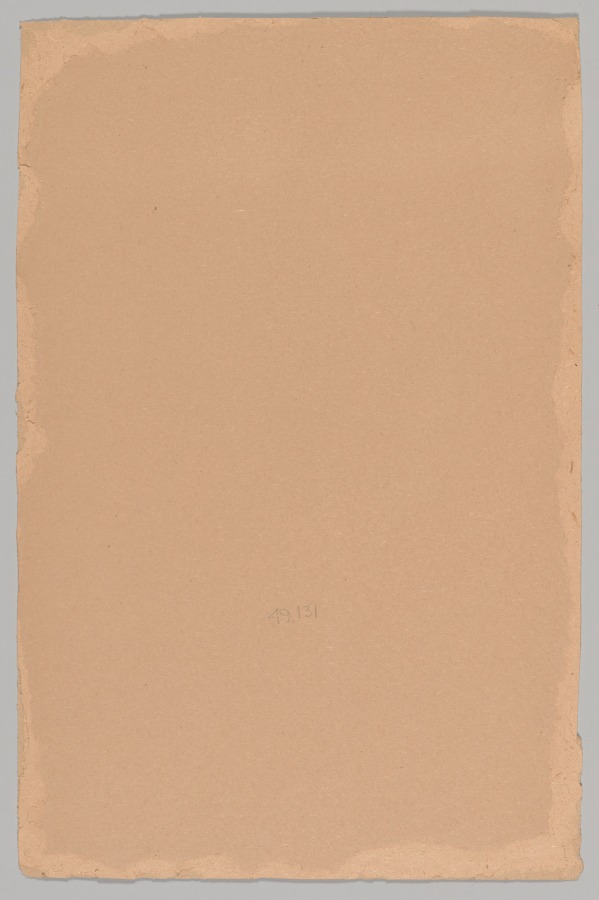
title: Act VII from the series The Storehouse of Loyal Retainers As Portrayed by Famous Beauties in Twelve Leaves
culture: Japan, Edo period (1615–1868)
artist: Kitagawa Utamaro (Japanese, c. 1754–1806)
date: 1794–95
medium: color woodblock print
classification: Print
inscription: Signature: Utamaro fude